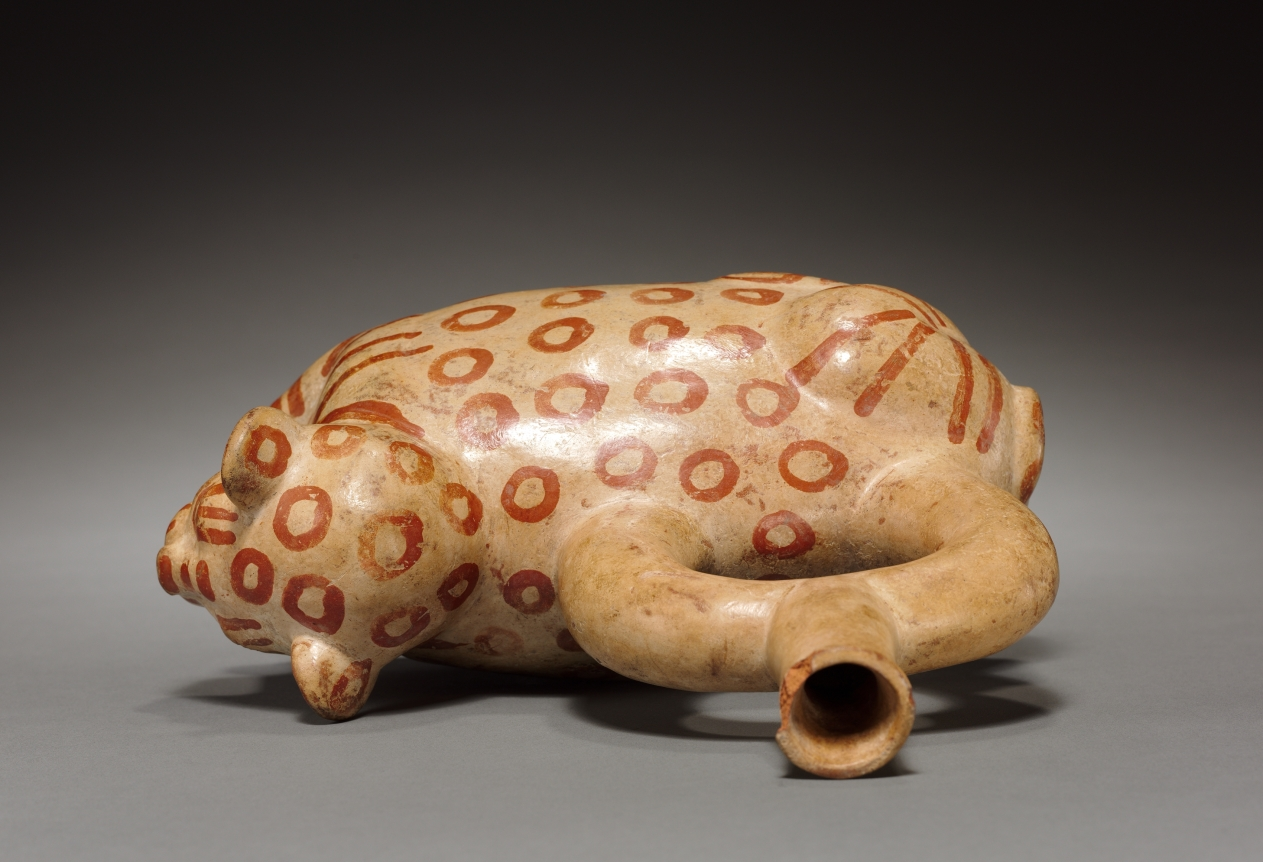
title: Stirrup Spouted Vessel of Feline Form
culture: Peru, Mochica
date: 1–1000 CE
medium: red earthenware decorated with cream-colored slip and brown pigment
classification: Ceramic